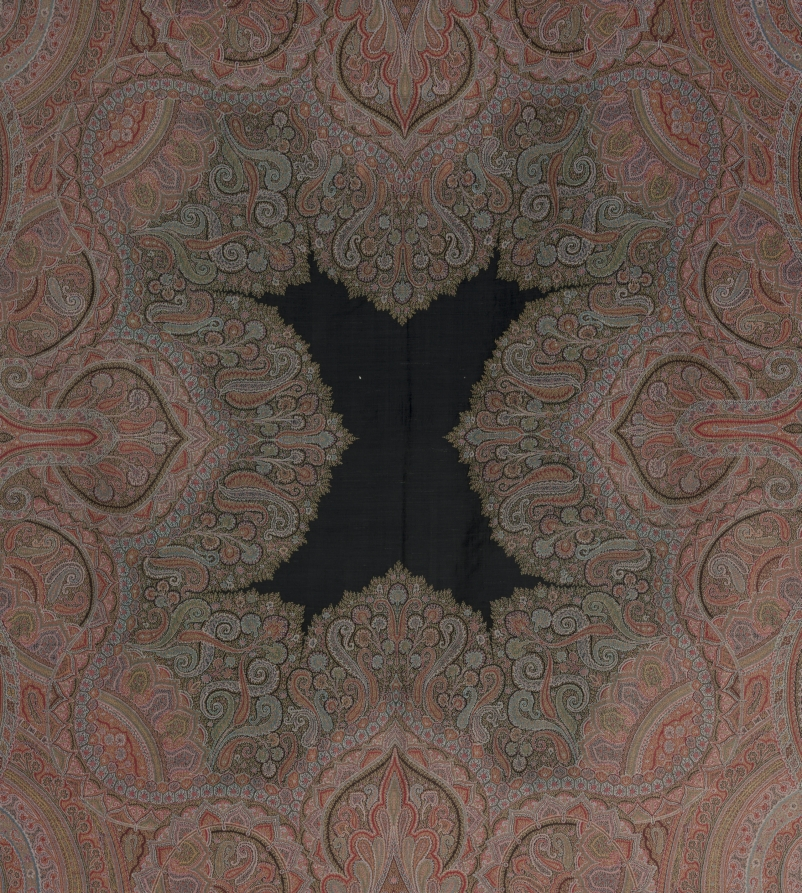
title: Long Shawl with Large Symmetrical Botehs and Small Black Center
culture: France, Paris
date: 1855–62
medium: silk?; supplementary weft pattern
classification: Textile